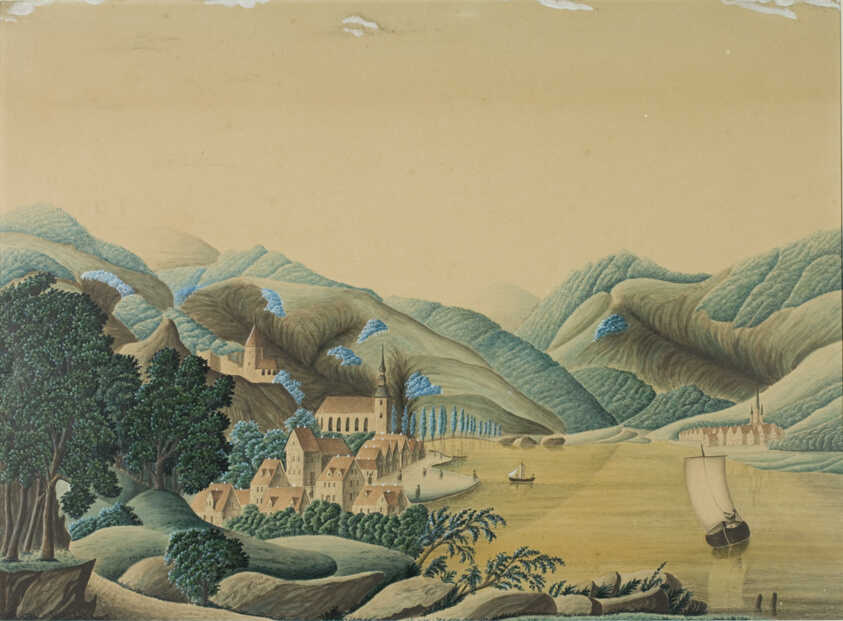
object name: Drawing and Watercolor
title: View of Braubach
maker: Ernst Damitz (American, born Germany, 1805-1883)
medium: Watercolor on ivory wove paper (discolored to tan)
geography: United States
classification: paper; watercolor; prints and drawing